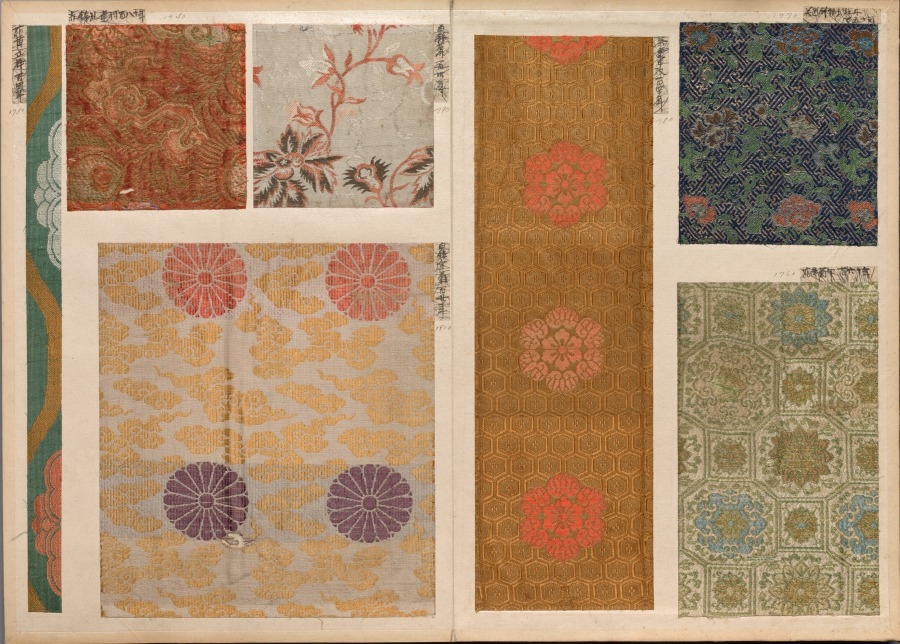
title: Album of Textile Samples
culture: Japan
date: 1790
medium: silk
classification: Textile